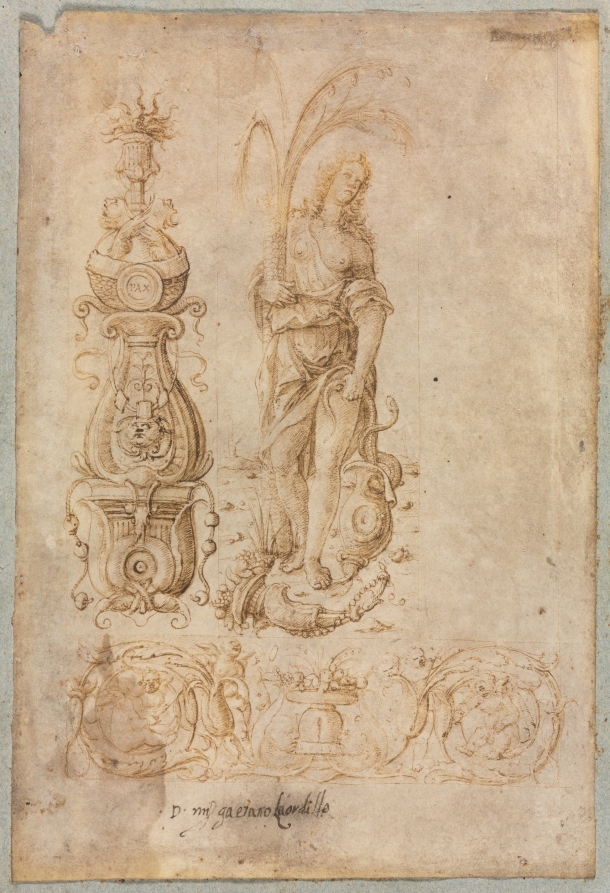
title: Design for a Candelabrum, Allegorical Figure of Abundance, Ornamental Relief Design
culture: Italy, late 15th century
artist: Bernardo Parentino (Italian)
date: c. 1490s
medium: pen and brown ink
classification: Drawing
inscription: Lower center: D . mi[o?] [likely an abbreviation for "Maestro"] gaetano Laordillo (brown ink)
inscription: Verso of secondary support, upper right: -[1?]9- (brown ink) center left: 65 (graphite)